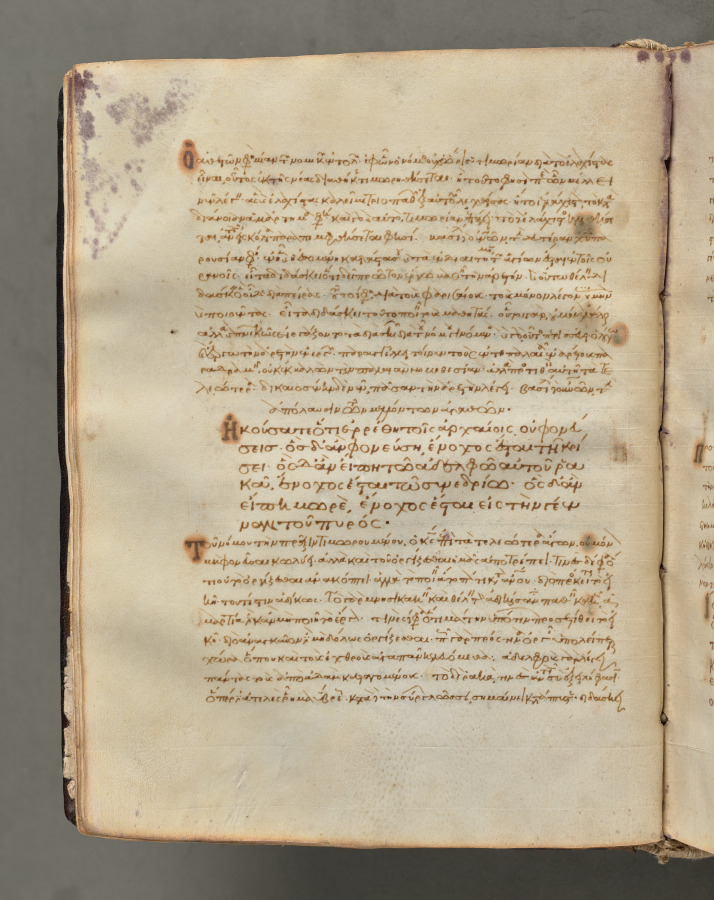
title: Text, folio 20 (verso), from a Gospel Book with Commentaries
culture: Byzantium, Constantinople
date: c. 1000–1100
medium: ink, tempera, and gold on vellum; leather binding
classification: Bound Volume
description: Each of the four gospels in this book opens on a page with brilliantly illuminated borders depicting the author of the text as well as birds-principally peacocks, symbols of the immortality of the soul-and fountains, representing the fountain of life and the salvation of the soul. This volume consists of 428 leaves with texts in Greek. Its level of sophistication suggests that it was probably written and decorated in a monastery in Constantinople.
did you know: Gospel Books were carried in procession through Byzantine churches.